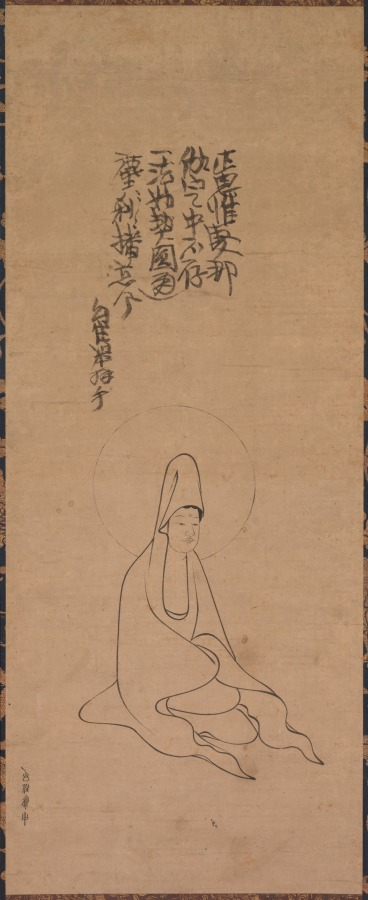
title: White-Robed Guanyin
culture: China, Yuan dynasty (1271-1368)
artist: Jueji Yongzhong (Chinese, active around 1300)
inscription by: Zhongfeng Mingben (Chinese, 1263–1323)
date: late 1200s–early 1300s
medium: hanging scroll; ink on paper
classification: Painting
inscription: Artist's signature: Huanzhu Yongzhong. Inscription by Zhongfeng Mingben: The right thinking [Samkalpa] is embodied within His deep meditation on the Buddha [naga-samadhi]. Retaining not even one single object of thought, A perfect harmony was wonderfully achieved. In the endless time and space, His all-embracing compassion prevails. [signed] Mingben of Huanzhu paying his respects.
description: Guanyin, the bodhisattva of infinite compassion (Avalokiteshvara, in Sanskrit), reveals himself in many forms. According to Buddhist belief, one such manifestation is the white-robed Guanyin sitting on a rock on the island of Putuo (Potalaka, in Sanskrit), located along the coast not far from Ningbo, in Zhejiang Province, China. Here, the figure was swiftly drawn in only a few ink lines. The inscription above is by Zhongfeng Mingben, perhaps the most widely respected and influential Chan (Zen in Japanese) master in the Yuan dynasty. The artist’s signature is a single line below on the left: Huanzhu Yongzhong.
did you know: The CMA collection includes a drawing by a Japanese priest, CMA 1978.47.2, inspired by this composition.